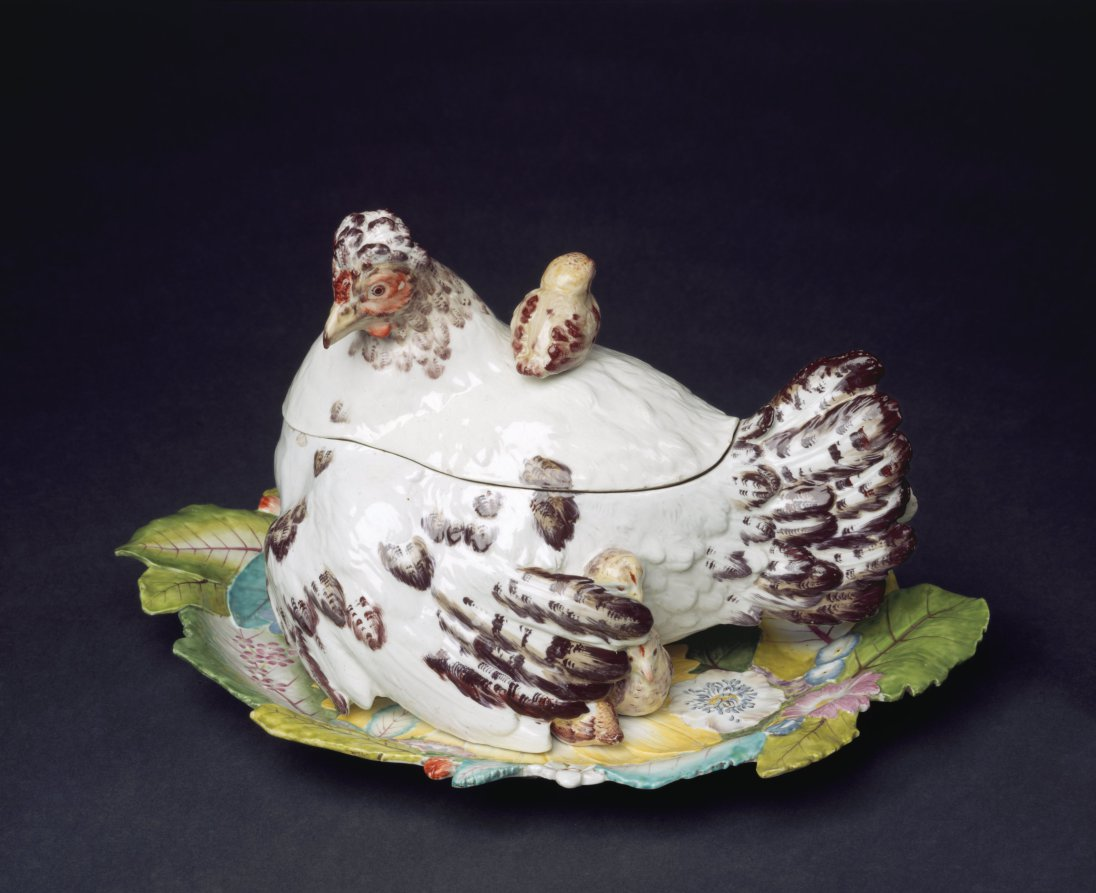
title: Stand for a Hen and Chicks Tureen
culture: England, London, Chelsea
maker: Chelsea Porcelain Factory (Britain, London, 1745–84)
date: c. 1755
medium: soft-paste porcelain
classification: Ceramic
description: The ceramic factory at Chelsea, located along the river Thames in western London, was Britain’s most renowned factory of decorative porcelain in the mid-1700s. Large tureens in the form of chickens or rabbits appealed to wealthy aristocrats, who took great care in developing specimen animal and poultry breeds on their country estates. The design for this particular tureen was taken from a popular seventeenth-century print by Francis Barlow depicting a farmyard.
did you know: See cover record for Hen and Chicks Covered Tureen (1984.58).